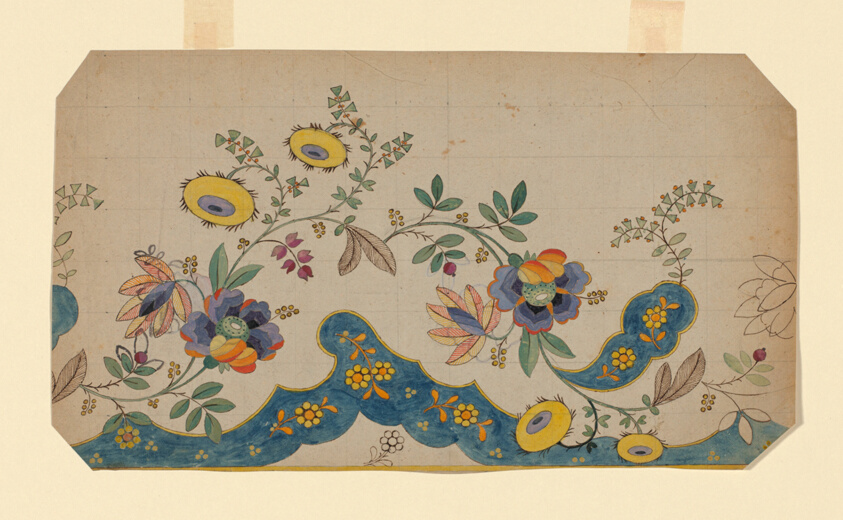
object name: Textile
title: Design for a Woven, Printed or Embroidered Border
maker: France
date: 18th/19th century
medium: Design on paper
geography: France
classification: textile; accessory - paper design; accessories (object genre)